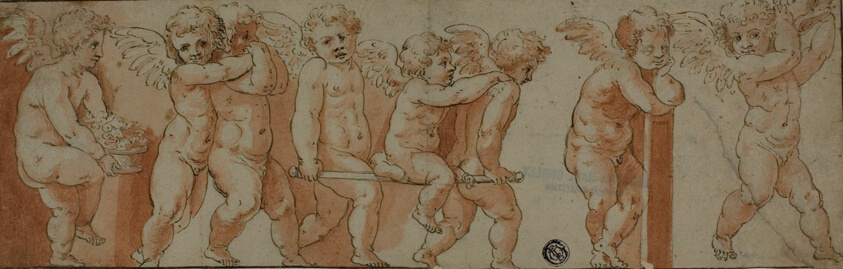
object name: Drawing and Watercolor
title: Frieze with Eight Putti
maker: After Polidoro Caldara, called Polidoro da Caravaggio; Italian, c. 1499-c. 1543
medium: Pen and brown ink and brush and red chalk wash on cream laid paper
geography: Italy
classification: ink and chalk wash; drawings (visual works); prints and drawing